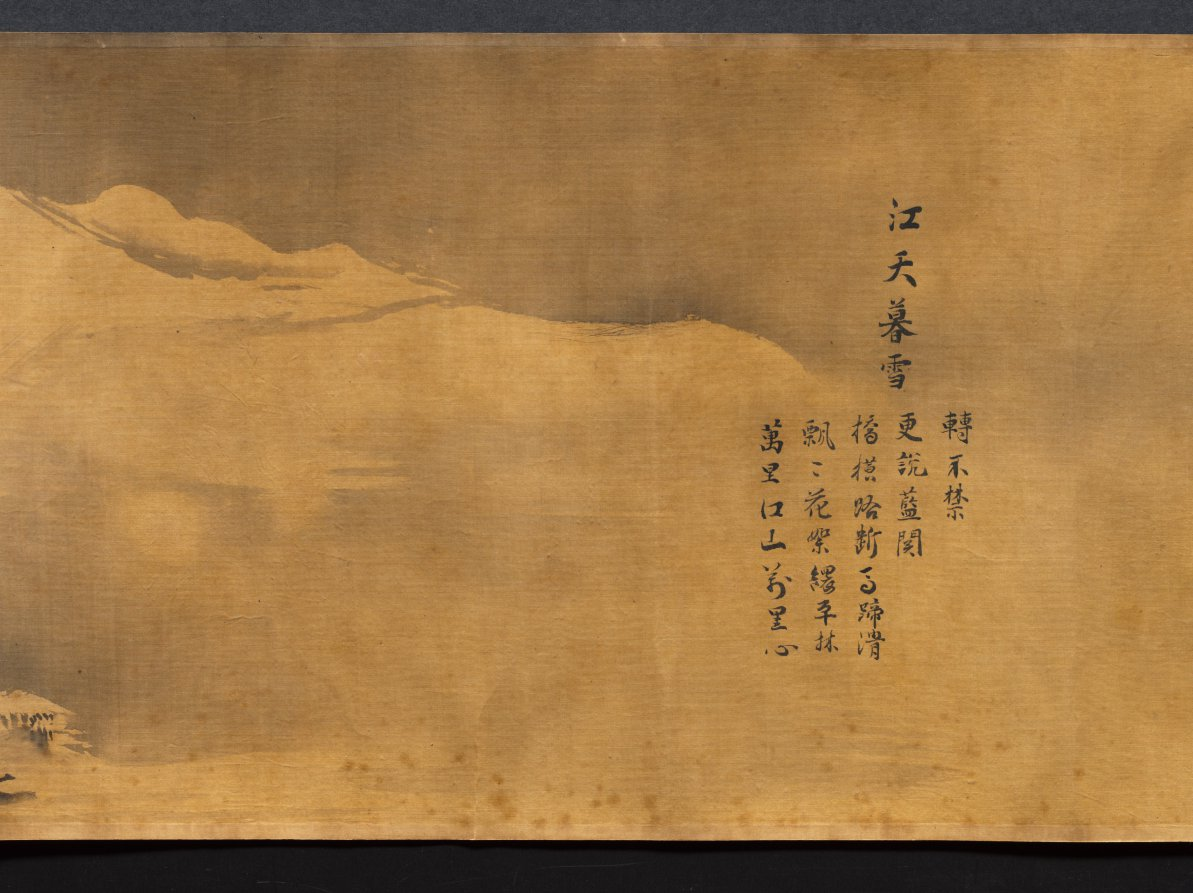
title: Eight Views of Xiao-Xiang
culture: Japan, Edo period (1615–1868)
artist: Kano Tan’yū (Japanese, 1602–1674)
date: 1615–1868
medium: handscroll; ink on silk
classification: Painting